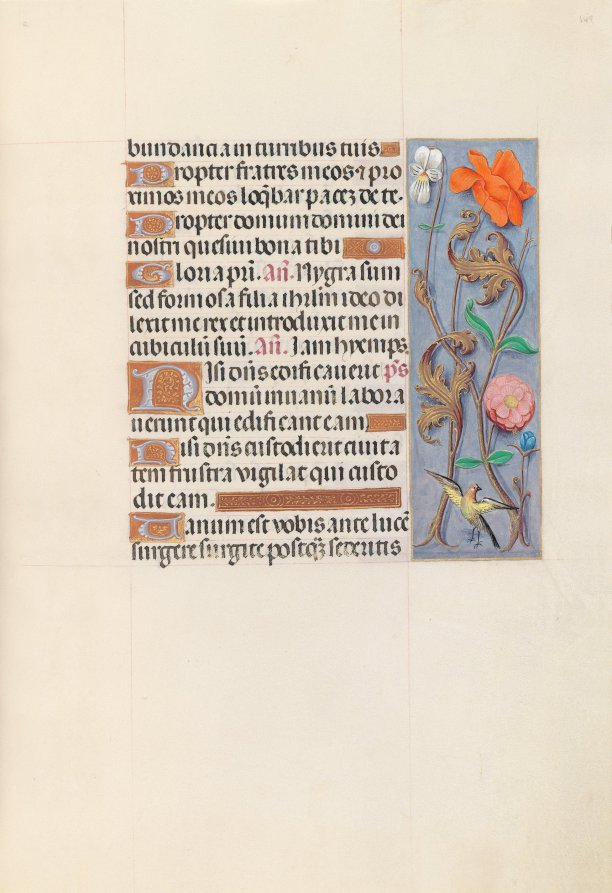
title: Hours of Queen Isabella the Catholic, Queen of Spain: Fol. 149r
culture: Flanders, Ghent and Bruges, late 15th century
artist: Master of the First Prayerbook of Maximillian (Flemish, c. 1444–1519)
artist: and Associates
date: c. 1500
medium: ink, tempera, and gold on vellum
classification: Bound Volume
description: This manuscript was illuminated by a circle of at least five highly organized manuscript painters active in the Flemish cities of Ghent and Bruges. The principal illuminator was Alexander Bening, who painted the majority of the book's miniatures. Manuscripts produced by this circle of artists are renowned for the decoration of their borders, which typically feature a rich variety of realistically-painted flowers, birds, and butterflies. This prayer book, called a book of hours, was intended not for a cleric, but for the private devotions of a lay person-in this case, Isabella the Catholic, Queen of Spain (1451-1504). Isabella's coat of arms embellishes the book's frontispiece. It is unlikely that the book was commissioned by the Queen herself; rather, she probably received it as a diplomatic gift from someone courting her patronage, perhaps Cardinal Francisco Jimenez de Cisneros. A Franciscan friar, Jimenez was dependent upon Isabella for his advancement, first to the post of Queen's confessor in 1492, and then to Archbishop of Toledo in 1495.